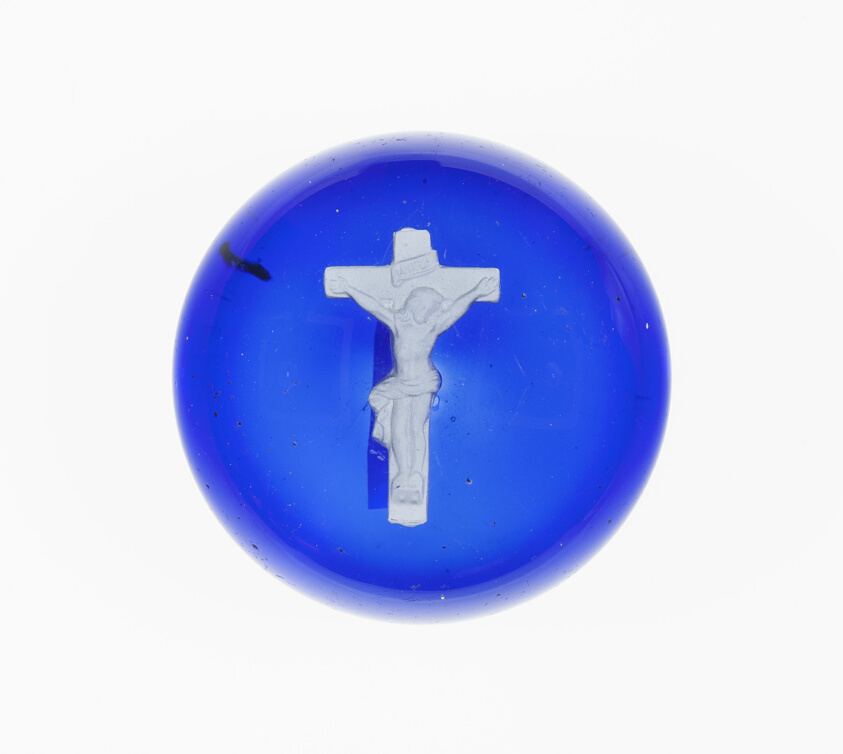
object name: Glass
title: Paperweight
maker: European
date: Mid 19th century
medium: Glass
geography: Europe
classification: paperweight; glass